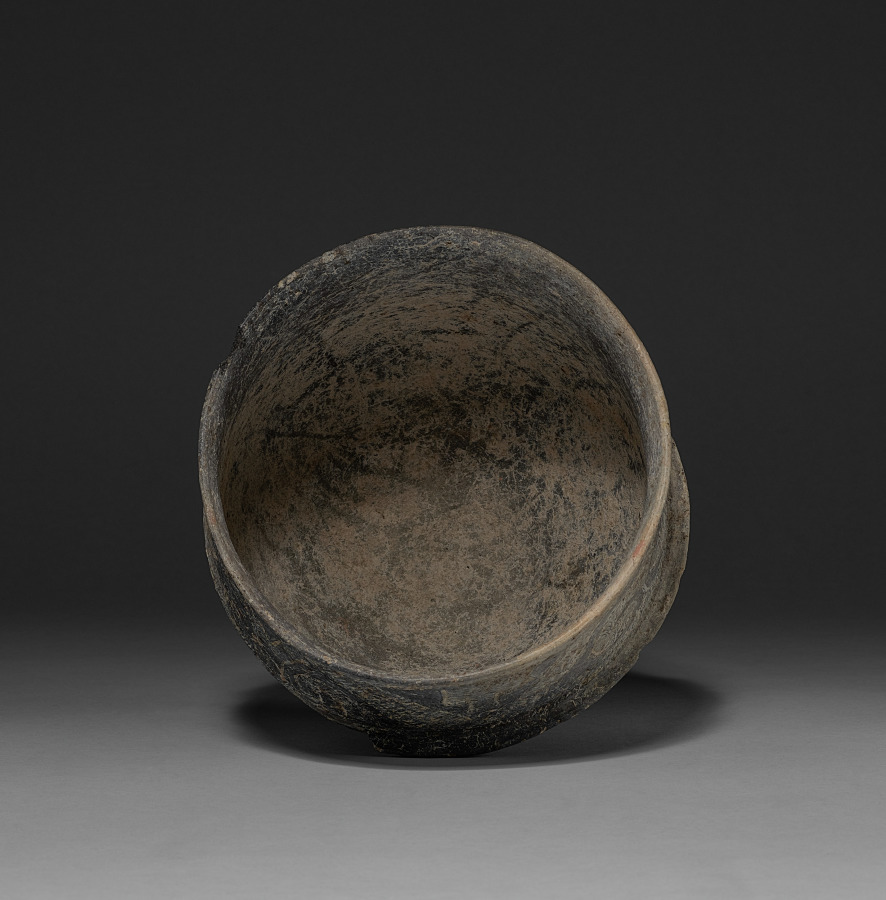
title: Jar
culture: Thailand, Ban Chiang, Neolithic Period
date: early 3000s BCE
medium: gray earthenware with incised decoration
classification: Ceramic